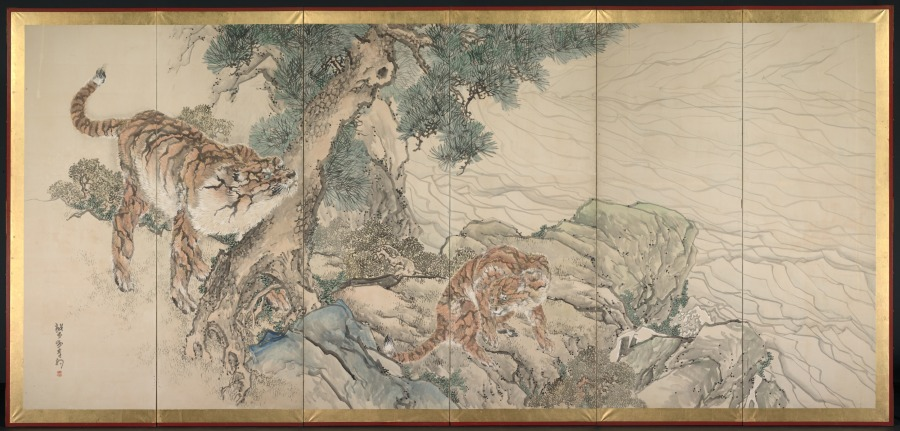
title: Tiger Family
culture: Japan, Edo period (1615–1868)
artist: Kishi Ganku (Japanese, 1749/56–1838)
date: early 1800s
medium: One of a pair of six-panel folding screens; ink and color on paper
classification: Painting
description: By the time this self-taught painter reached his thirties, his paintings were keenly sought after by Kyoto’s sophisticated patrons, including members of the imperial family. Judging from the surviving works, his supporters delighted in the colorful, auspicious imagery of Chinese historical figures, blossoming plum trees, cranes, peacocks, roosters, and especially tigers. Kishi Ganku was originally from the coastal town of Kanazawa, but relocated to Kyoto to work for the Arisugawa family. His work incorporates stylistic elements from the Kano school, the Maruyama school, and works by the Chinese artist Shen Nanping (1682–1760).